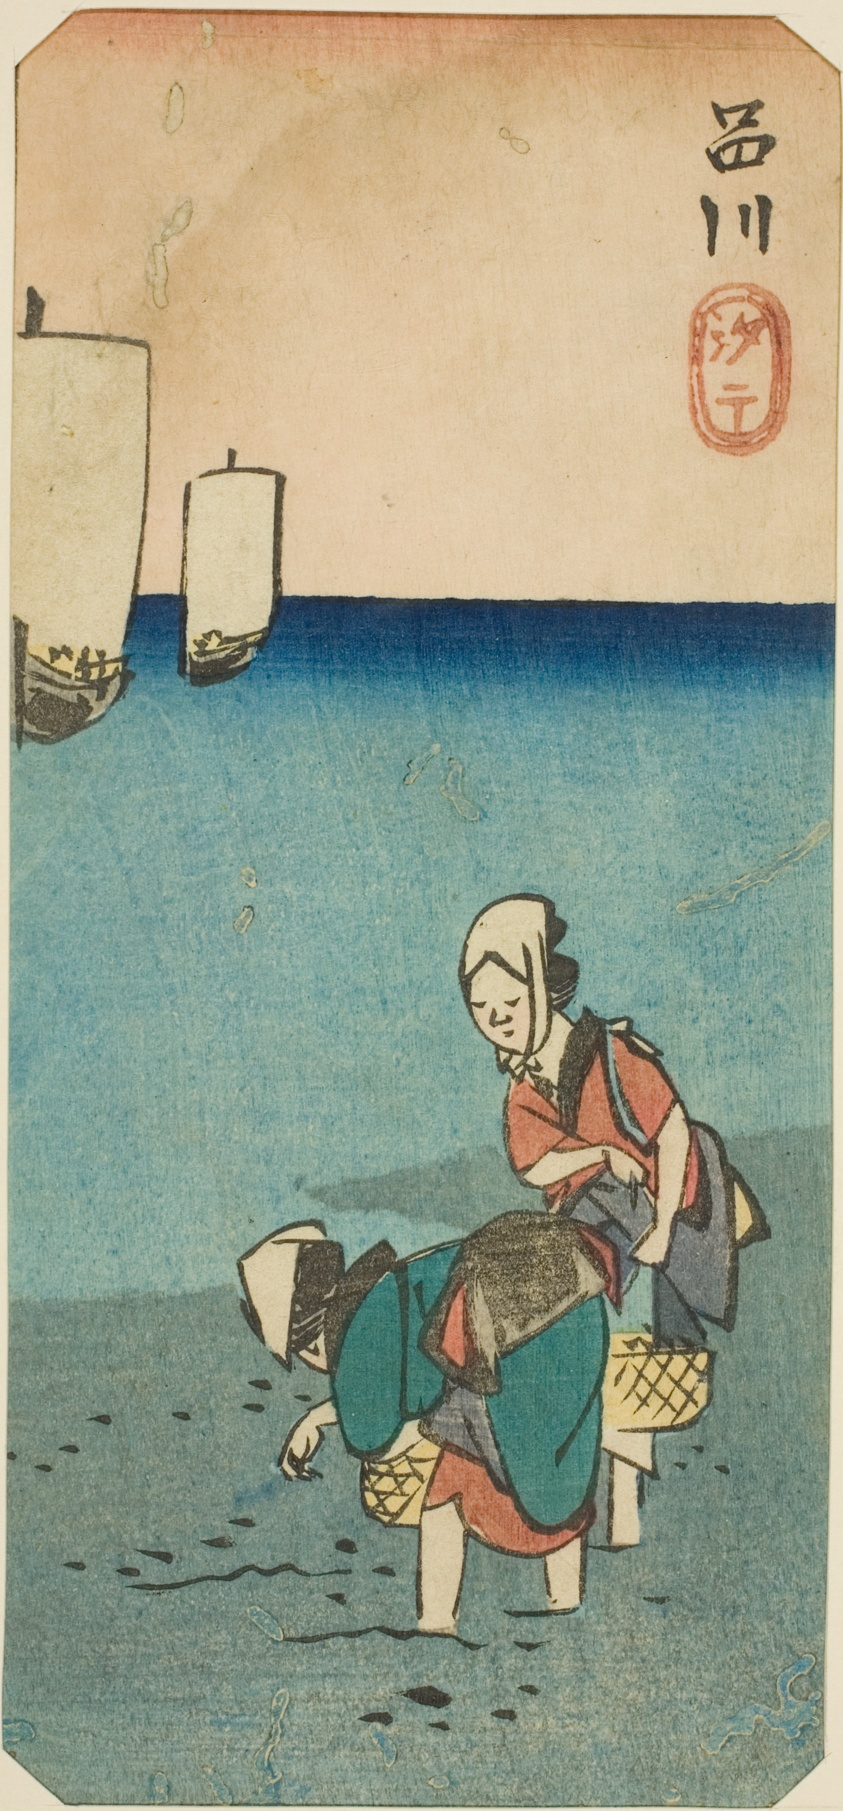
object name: Print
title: Low Tide at Shinagawa (Shinagawa shiohi), section of a sheet from the series "Cutouts of Famous Places in Edo (Harimaze Koto meisho)"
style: Japanese (culture or style)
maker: Utagawa Hiroshige 歌川 広重; Japanese, 1797-1858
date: 1852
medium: Color woodblock print; section of harimaze sheet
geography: Japan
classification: woodblock print; print; asian art